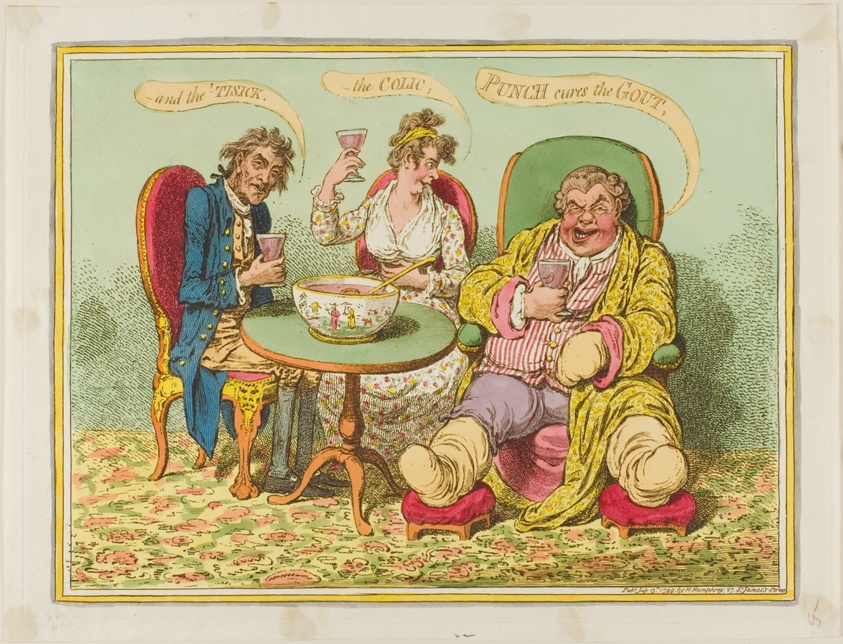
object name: Print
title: Punch Cures the Gout, the Colic, and the 'Tisick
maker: James Gillray (English, 1756-1815); published by Hannah Humphrey (English, c. 1745-1818)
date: published July 13, 1799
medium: Hand-colored etching with engraving on ivory wove paper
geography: England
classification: etching; print; prints and drawing